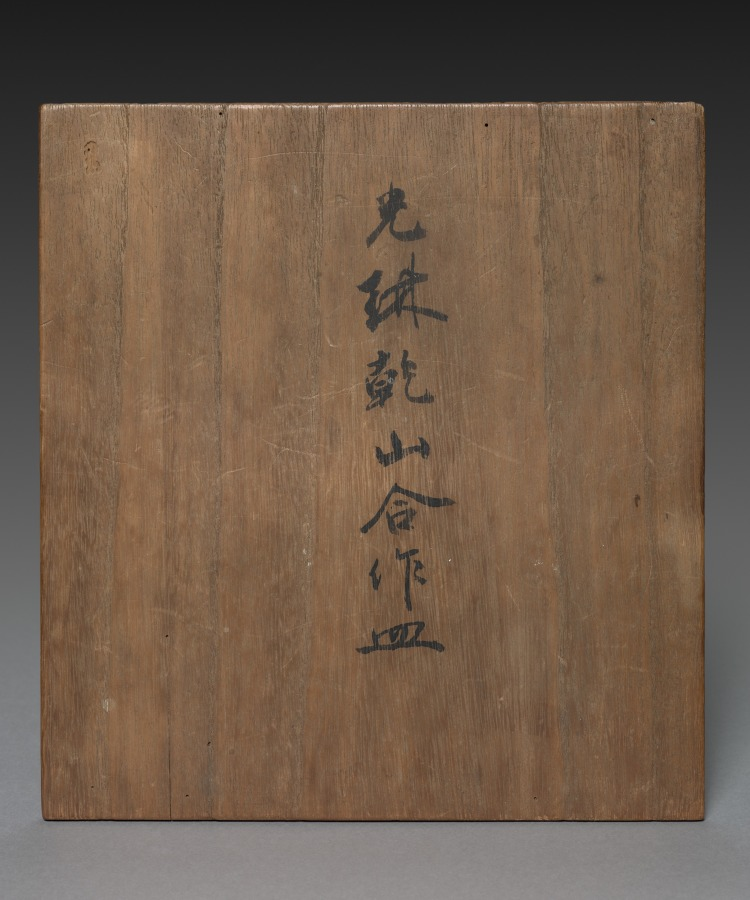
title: Square Dish with Design of Plovers over Waves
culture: Japan, Edo period (1615–1868)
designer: Ogata Kōrin (Japanese, 1658–1716)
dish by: Ogata Kenzan (Japanese, 1663–1743)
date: c. 1700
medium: Glazed stoneware with iron oxide underglaze slip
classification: Ceramic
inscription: design painted by Korin and signed "Jakumei Korin Gaku"; inner and outer faces of four walls probably painted by an assistant at the kiln, underside of dish signed, "Kenzan."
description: The Ogata brothers Kōrin and Kenzan often collaborated on ceramics. This dish is one of a set used for serving tea cakes. Kenzan shaped the dish, after which Kōrin drew the iron oxide design of plovers, a type of shorebird, flying over waves. Kenzan then covered the object with a clear glaze and fired it. Kōrin placed his signature next to his design, while Kenzan signed the back.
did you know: The design of plovers flying over waves derives from Heian period (900s–1100s) literature and later lacquerware designs.